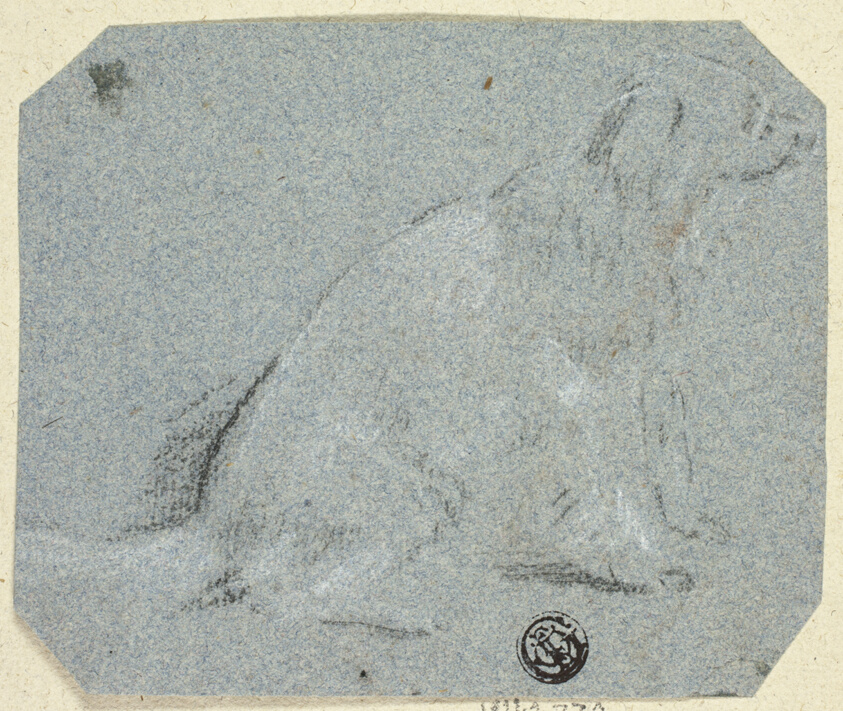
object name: Drawing and Watercolor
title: Seated Dog in Profile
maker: Unknown Artist; English, 19th century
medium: Black chalk, heightened with white chalk, on blue laid paper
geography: United Kingdom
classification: chalk; paper; drawings (visual works); prints and drawing